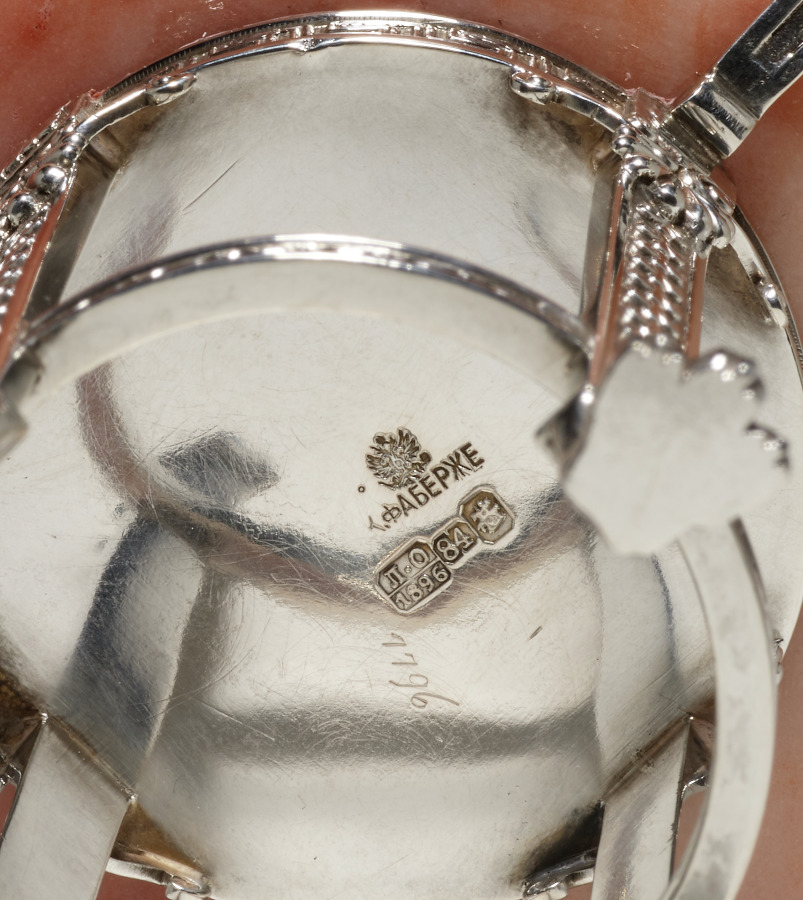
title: Miniature Compote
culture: Russia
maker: House of Fabergé (Russian, 1842–1918)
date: 1896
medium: silver, aventurine quartz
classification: Silver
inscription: Stamped: Fabergé (in Cyrillic) surmounted by double-headed eagle (imperial warrant); 1896, surmounted by tester's initials for Lev Oleks (active 1895-8), 84, Saint George [three punch assay mark for Moscow]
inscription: Scratched: 7796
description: The House of Fabergé specialized in the creation of little treasures intended as opulent personal gifts. In creating luxurious accessories for a desk or tabletop, Fabergé often used native hardstones such as multicolored agate and quartz, green nephrite, pink rhodonite, and rock crystal found in the Ural Mountains of western Russia. Fabergé's designers often paired hardstones with silver mounts, particularly in the Moscow workshop where the silver studios were concentrated.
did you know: Pink aventurine is the rarest form of this type of quartz, which is most commonly found in an olive green form.